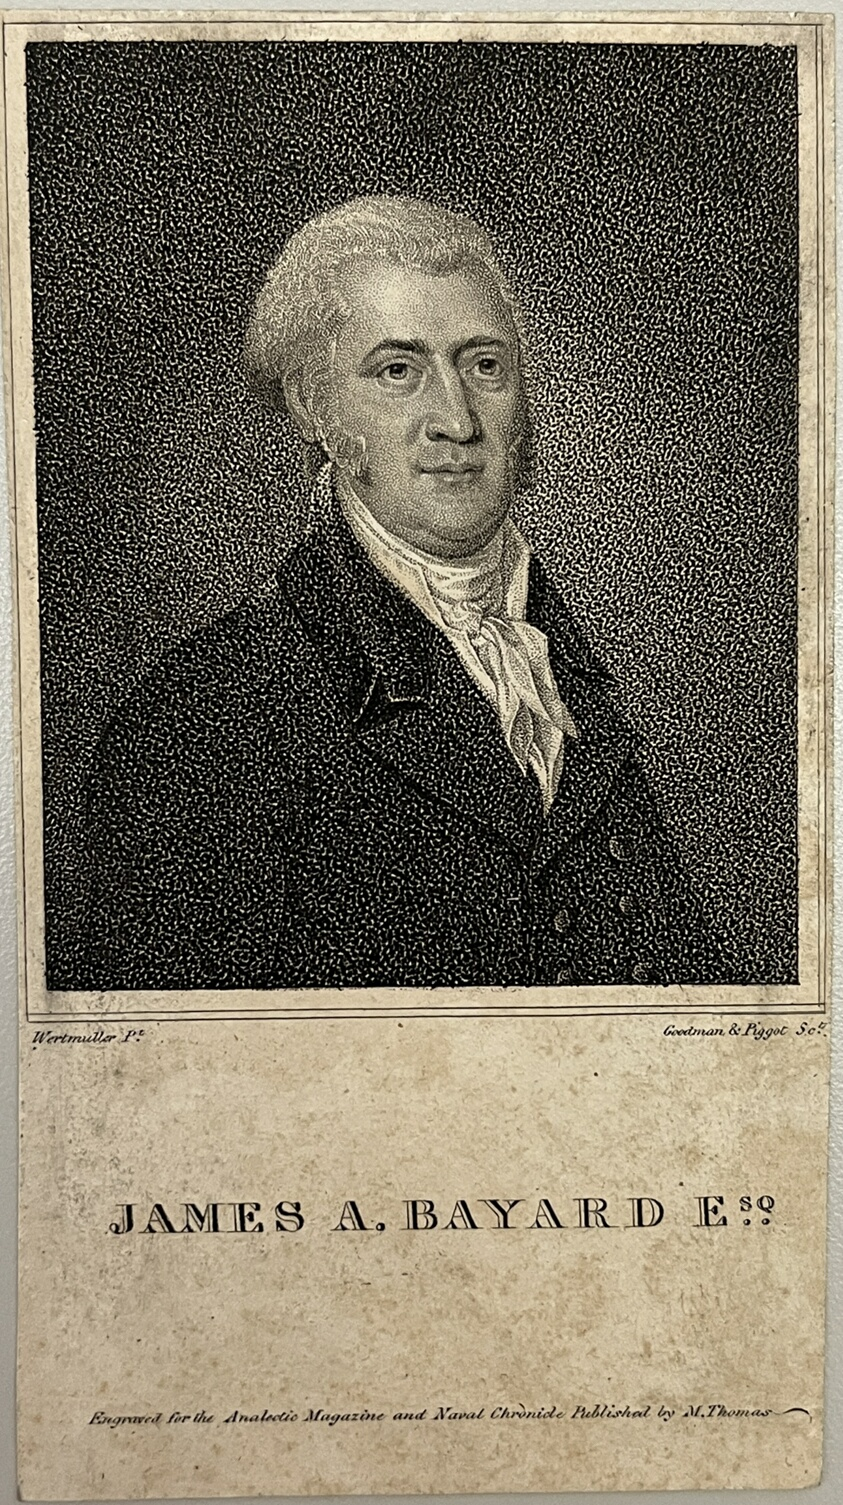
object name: Print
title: James A. Bayard Esquire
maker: Charles Goodman (American, 1796–1835); and Robert Piggot (American, 1795–1887); published by Moses Thomas (American, 1856-1934); after Adolf Ulrich Wertmüller (Swedish, active in America, 1751–1811)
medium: Stipple etching on paper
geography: United States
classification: reproduction; print; prints and drawing